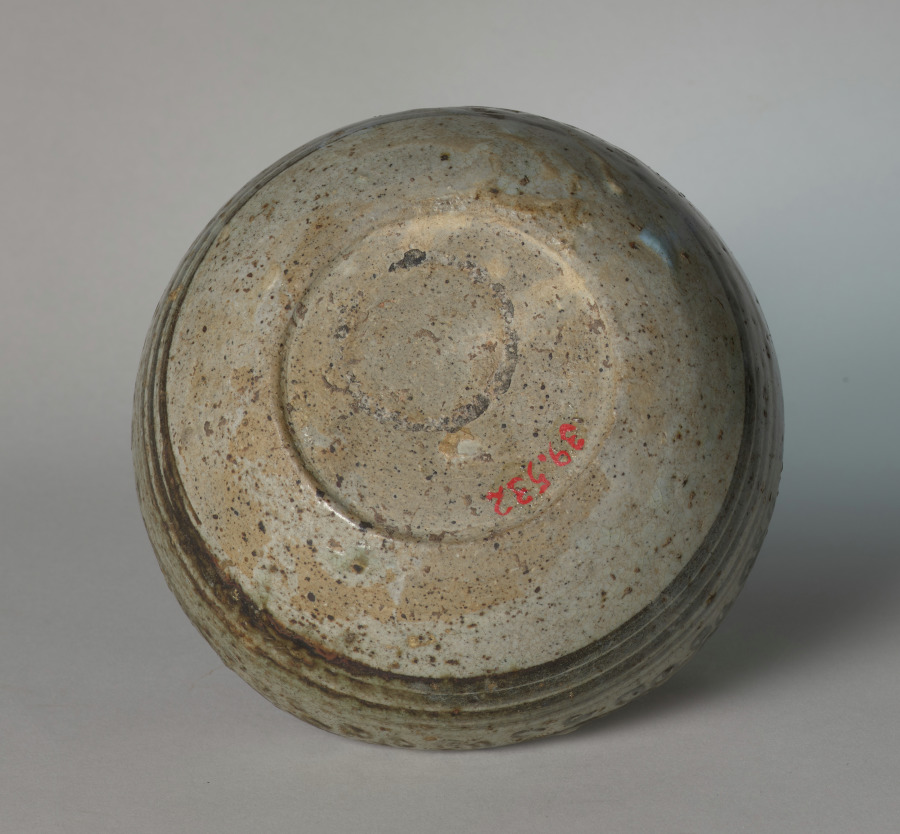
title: Covered Bowl with Painted Decoration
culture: Siam, Sawankhalok ware, 15th century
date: 1400s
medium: stoneware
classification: Ceramic